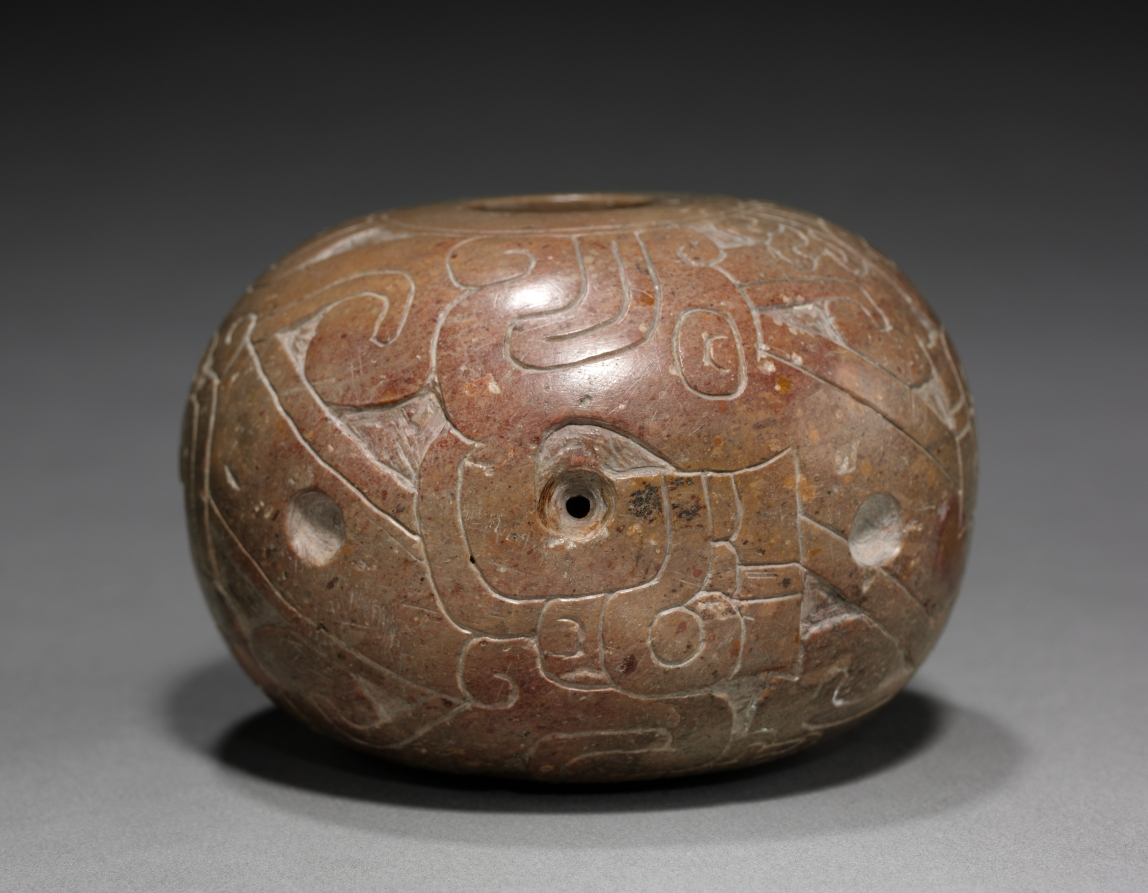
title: Container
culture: Peru, North Coast, Cupisnique style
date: 1200–200 BCE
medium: steatite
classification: Stone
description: While Chavín held sway in the highlands, coastal artists produced many objects in non-Chavín styles. Such is the case with these small, finely-carved, stone containers, which were part of north coast ritual paraphernalia, though their specific use in unclear. Both bear complex designs based on fanged heads in profile that lack lower jaws.